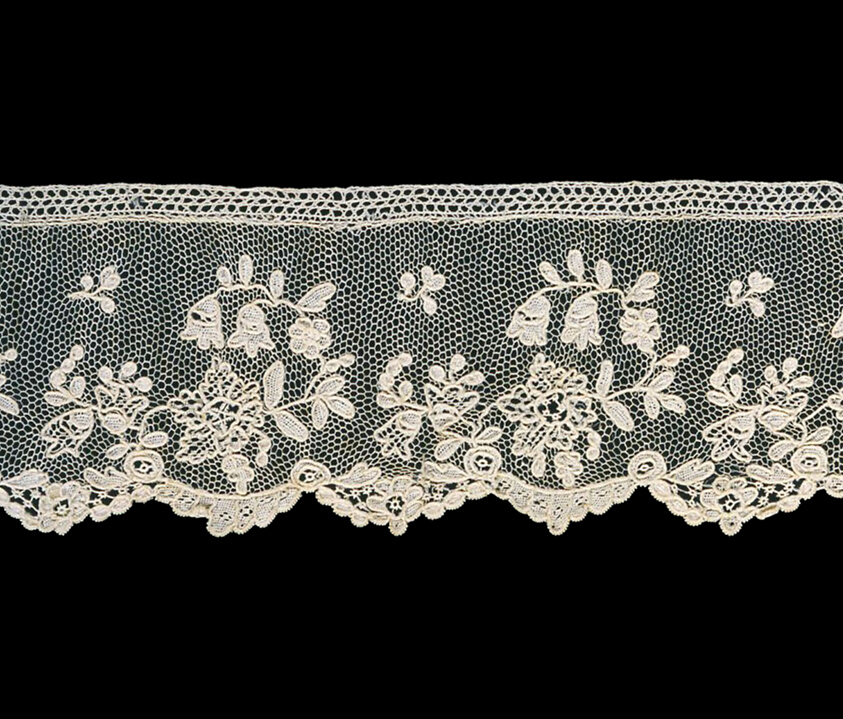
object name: Textile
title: Borders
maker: France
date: 1820s/30s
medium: Linen and horsehair, needle lace of a type known as "Point D'Aleçon"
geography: France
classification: textile; lace - needle